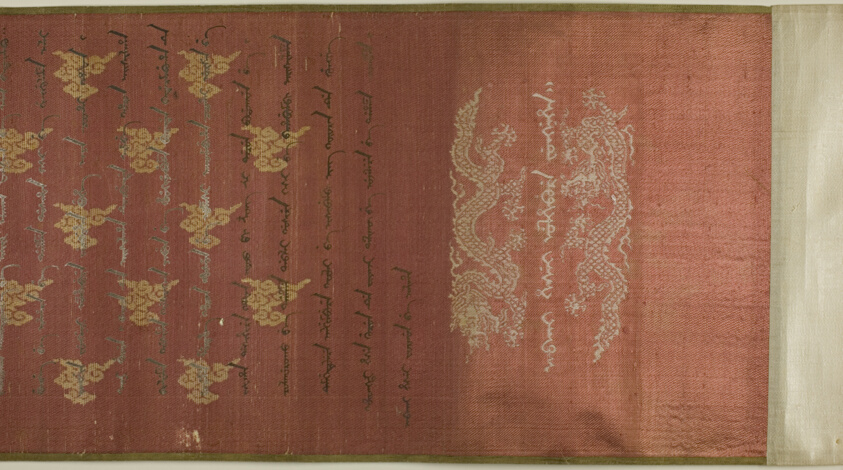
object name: Painting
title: Imperial Edict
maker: Chinese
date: Dated: October 12, 1856, in the reign of Emperor Xianfeng (1851–1861)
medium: Ink and colors on silk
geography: China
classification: handscroll; painting; asian art